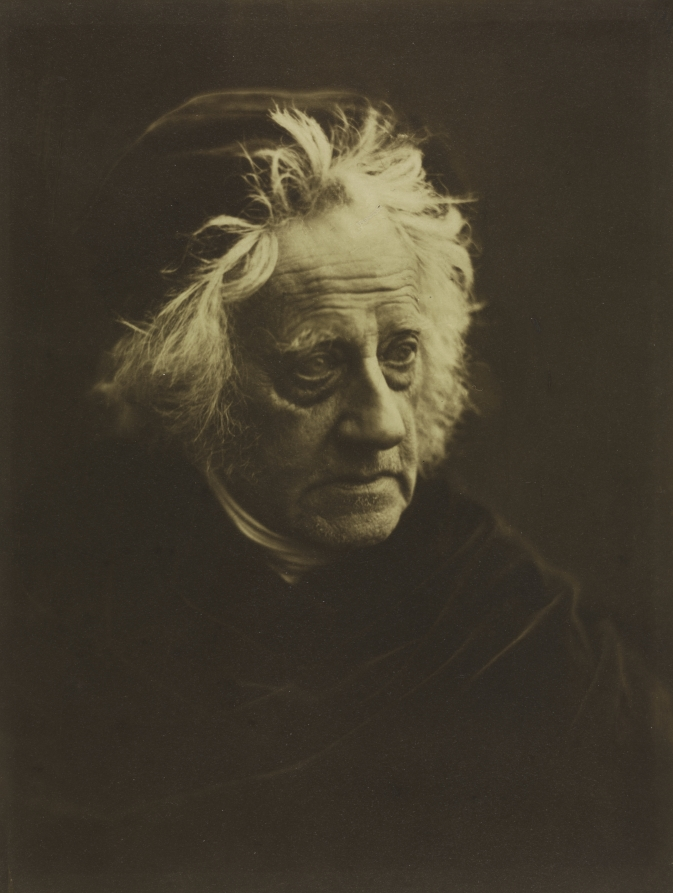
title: Sir John Herschel (1792-1871)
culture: England, 19th century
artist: Julia Margaret Cameron (British, 1815–1879)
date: 1867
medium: albumen print from wet collodion negative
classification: Photograph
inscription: Written in pencil on verso: "Herschell / by Julian [sic] Margaret / Cameron [underlined]"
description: Herschel, a renowned British mathematician, scientist, and innovator in photographic chemistry, was not just Cameron’s friend; she regarded him as “a Teacher and High Priest.” She wrote that when such great men posed for her, her “whole soul has endeavored to do its duty towards them in recording faithfully the greatness of the inner [being] as well as the features of the outer man.”